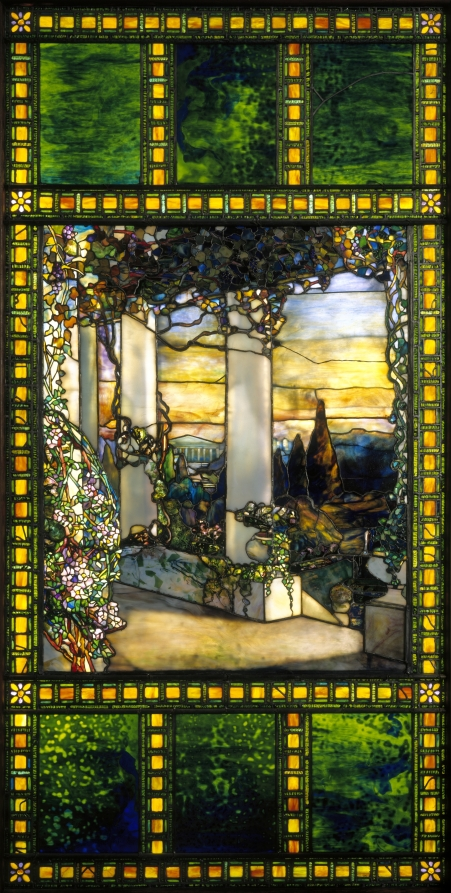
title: Hinds House Window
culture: America, New York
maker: Tiffany Glass & Decorating Company (America, New York, 1892–1902)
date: c. 1900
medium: leaded glass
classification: Glass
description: In this window commissioned for the Howell Hinds house around 1900, thousands of richly colored glass pieces have been arranged and layered to paint an idyllic three-dimensional scene that would have warmly glowed in the afternoon sunlight. Located at 2200 Overlook Road in Cleveland, Ohio, the house was demolished in 1930 in a similar fate as other nearby estates. Photographs show the placement of the window in the drawing room next to the fireplace as well as the opulent interiors Louis Comfort Tiffany designed for the library and dining room.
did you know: This window incorporates layered pieces of glass, producing shadows and creating a multidimensional quality.